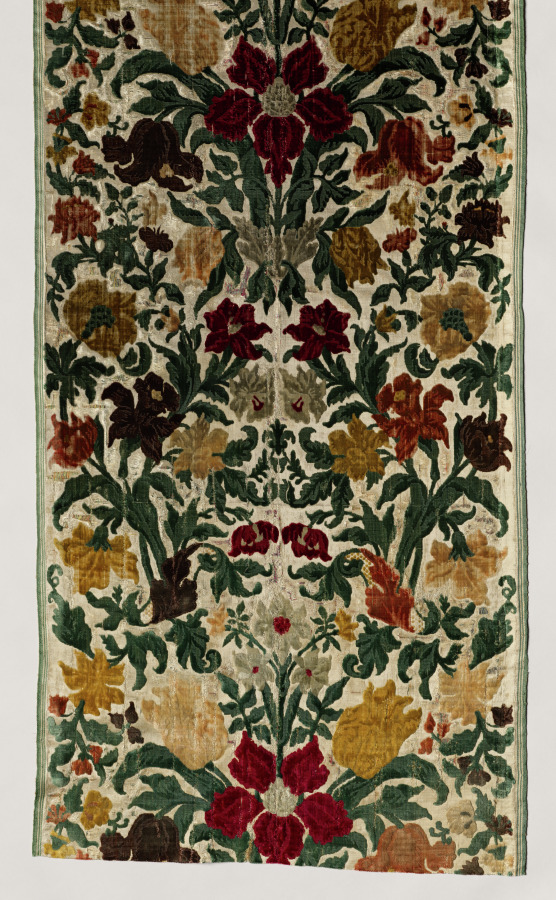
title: Length of Floral Velvet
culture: Italy, Genoa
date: 1600s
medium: velvet (cut, uncut, voided); silk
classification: Velvet